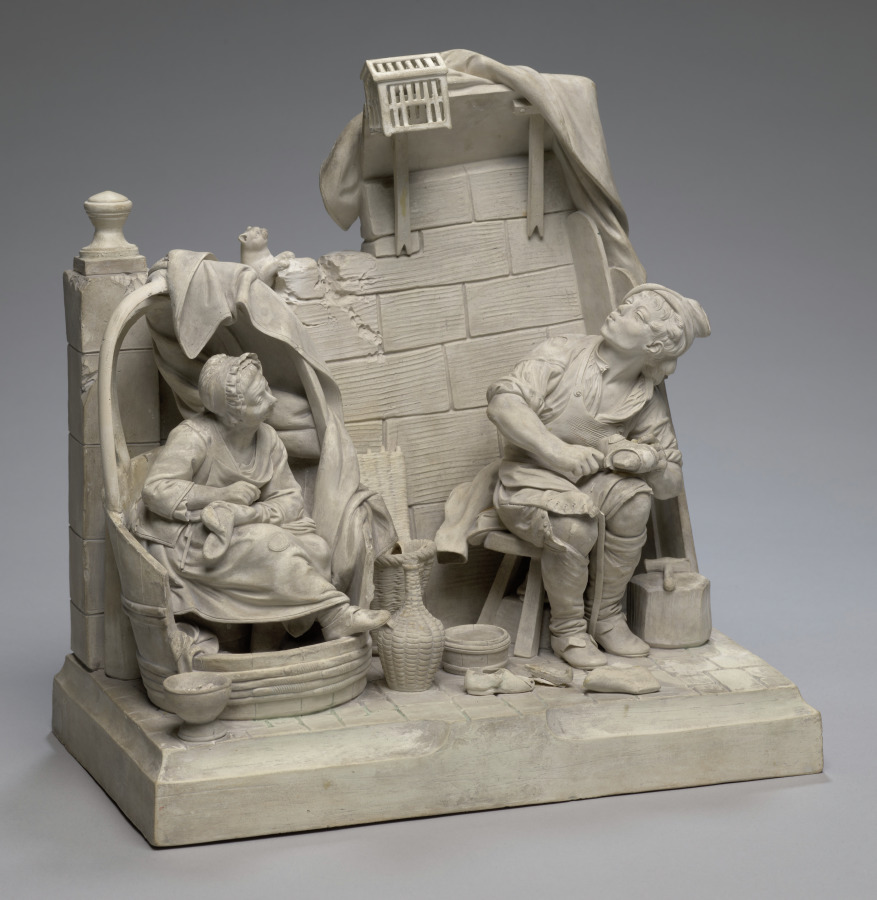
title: The Cobbler and His Bird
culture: France, Bellevue near Toul, late 18th century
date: late 1700s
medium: earthenware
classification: Ceramic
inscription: incised inscription on back of base: "Bellevue van de Toul."